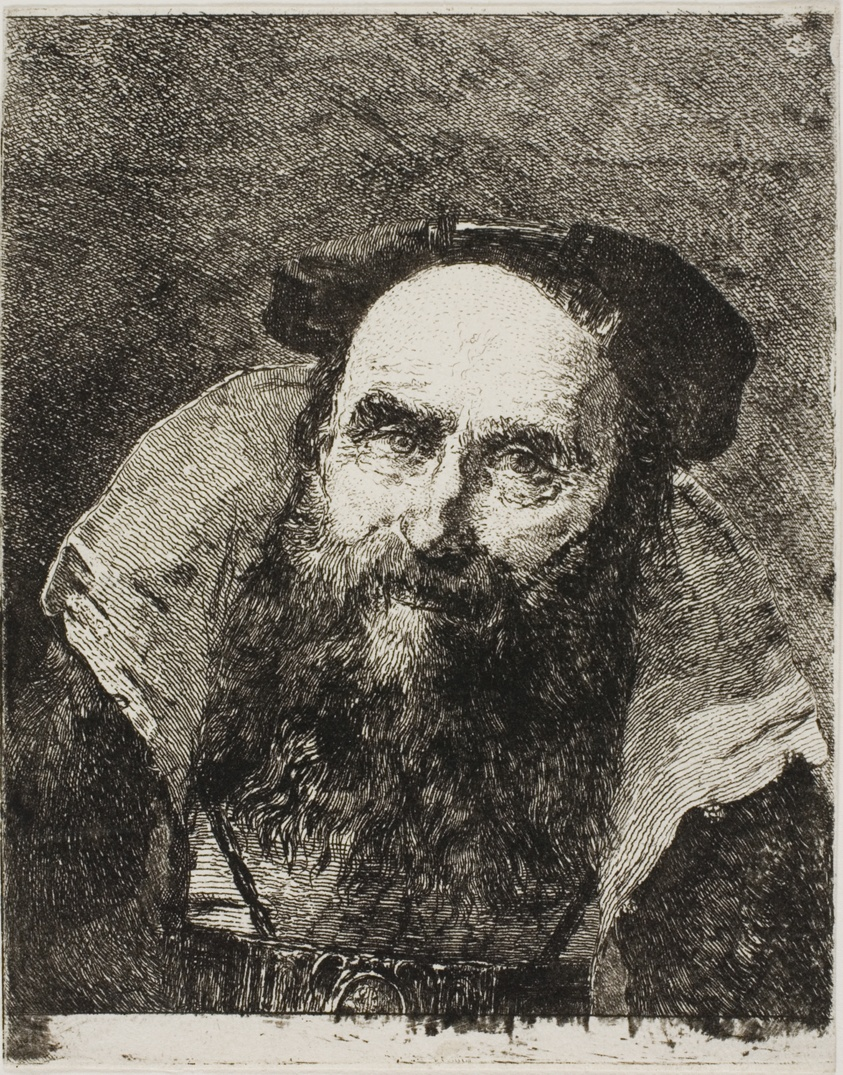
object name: Print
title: Smiling Old Man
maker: Giovanni Domenico Tiepolo (Italian, 1727-1804); after Giambattista Tiepolo (Italian, 1696-1770)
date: 1770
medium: Etching printed in black on paper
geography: Italy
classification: etching; print; prints and drawing